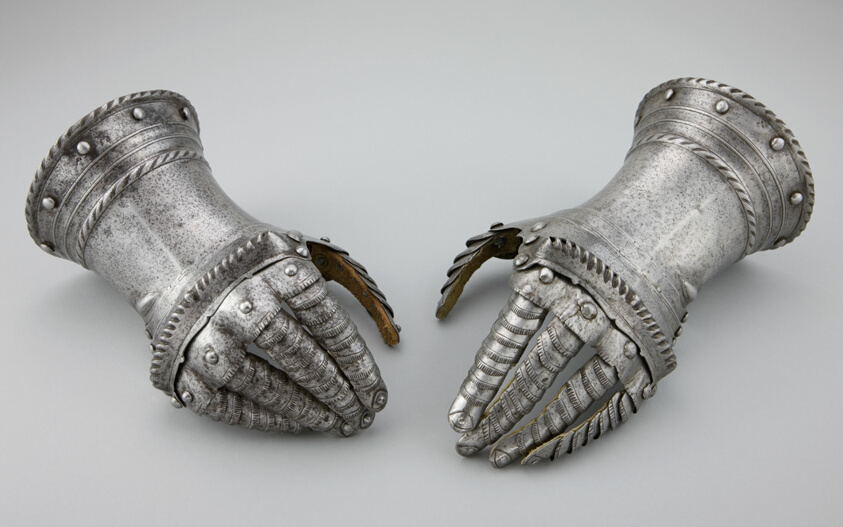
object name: Armor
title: Pair of Fingered Gauntlets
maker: Flemish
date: c. 1520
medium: Steel and leather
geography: Flanders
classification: suit-gauntlet; armor; arms and armor